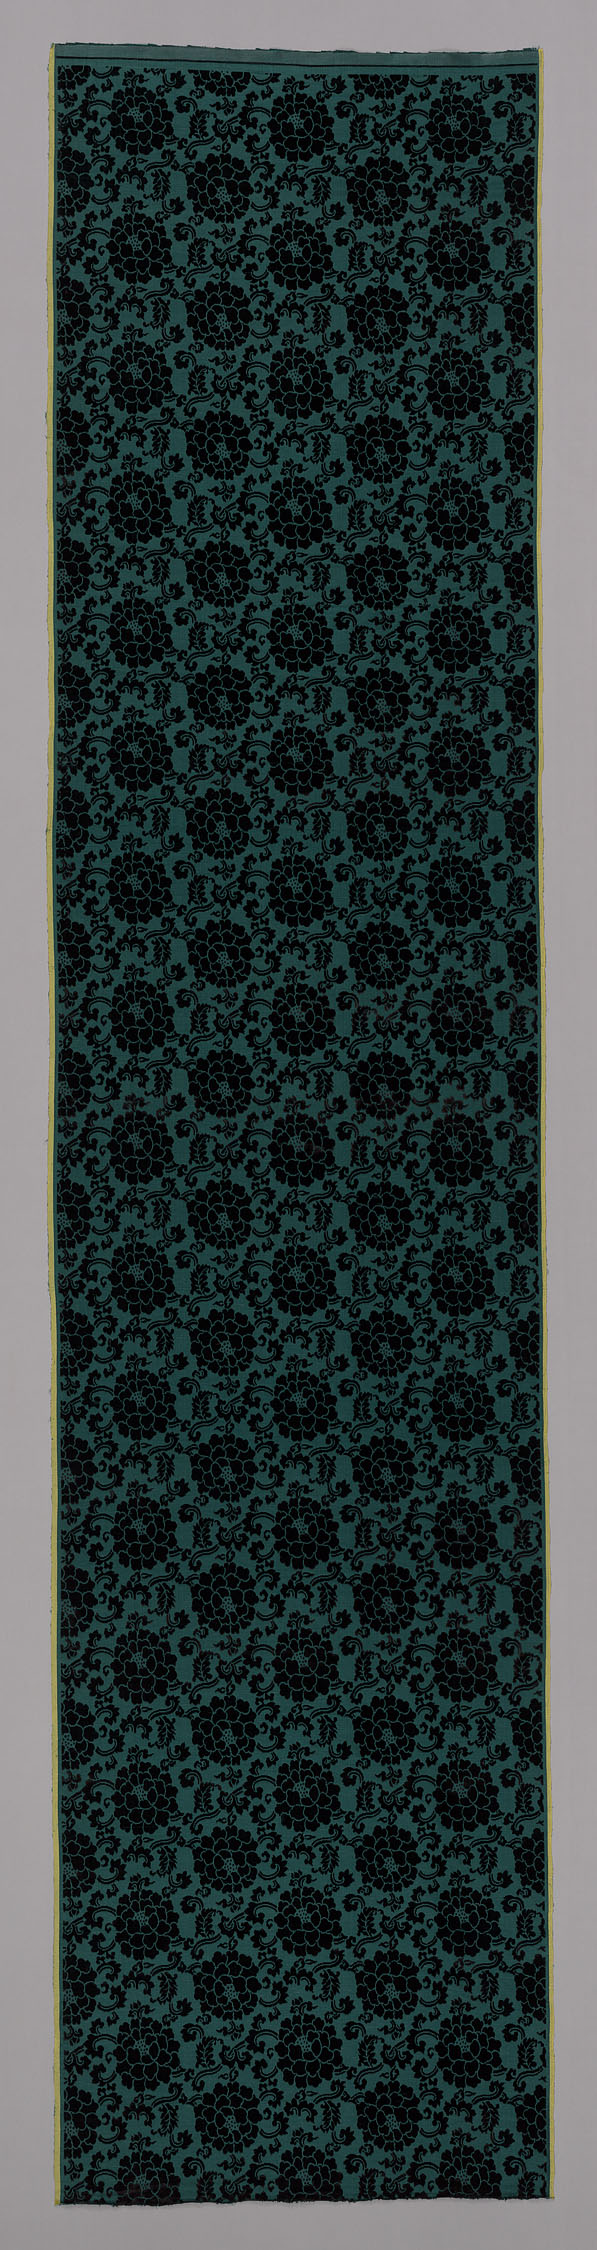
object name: Textile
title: Panel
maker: China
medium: Silk, bands of satin weave with supplementary pile warps forming cut and voided velvet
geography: China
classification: textile; weaving - velvet